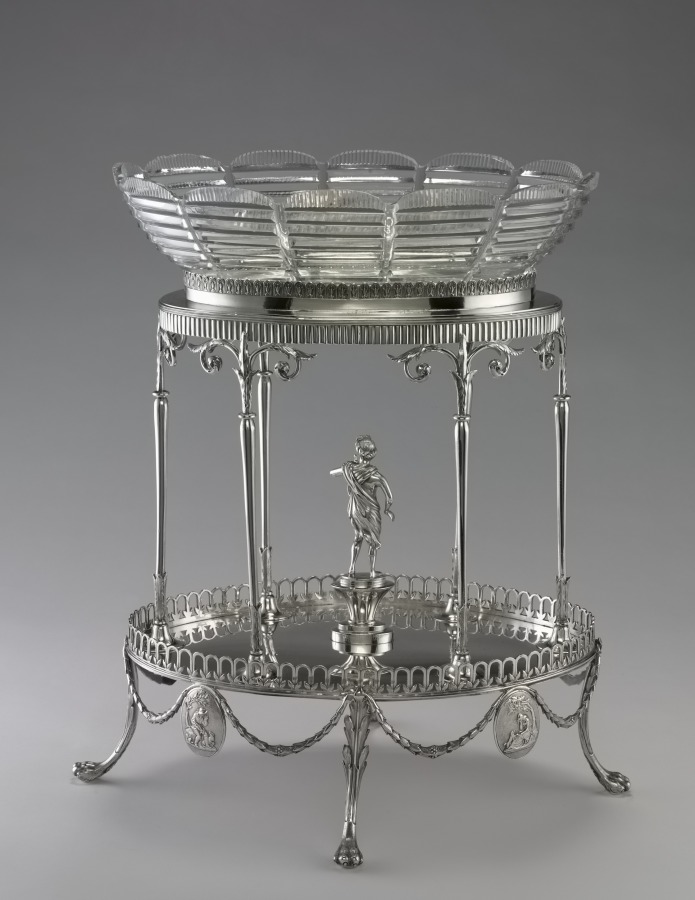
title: Centerpiece (metal stand and glass bowl)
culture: England, 18th century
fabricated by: William Pitts (British)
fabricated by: Joseph Preedy (British)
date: 1792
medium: silver and glass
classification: Silver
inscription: engraved: arms and crest of Bell Coat of arms with Bell impaling Brandling on flat platform.